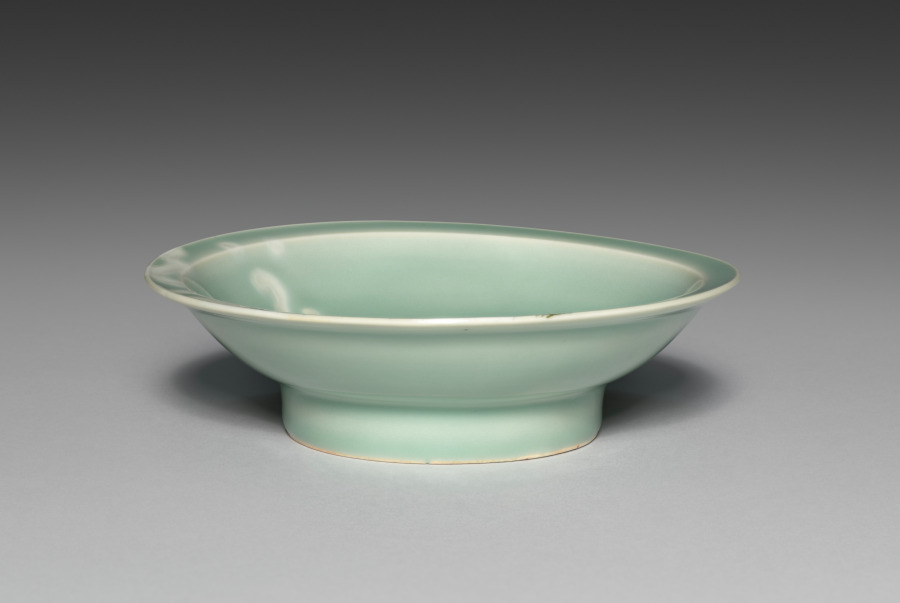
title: Small Dish (Kozara) with Waves and Reeds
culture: Japan, Edo period (1615–1868)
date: late 1600s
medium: Porcelain with underglaze blue and celadon (Hizen ware, Nabeshima type)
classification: Ceramic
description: This dish has a green glaze often called celadon in English.